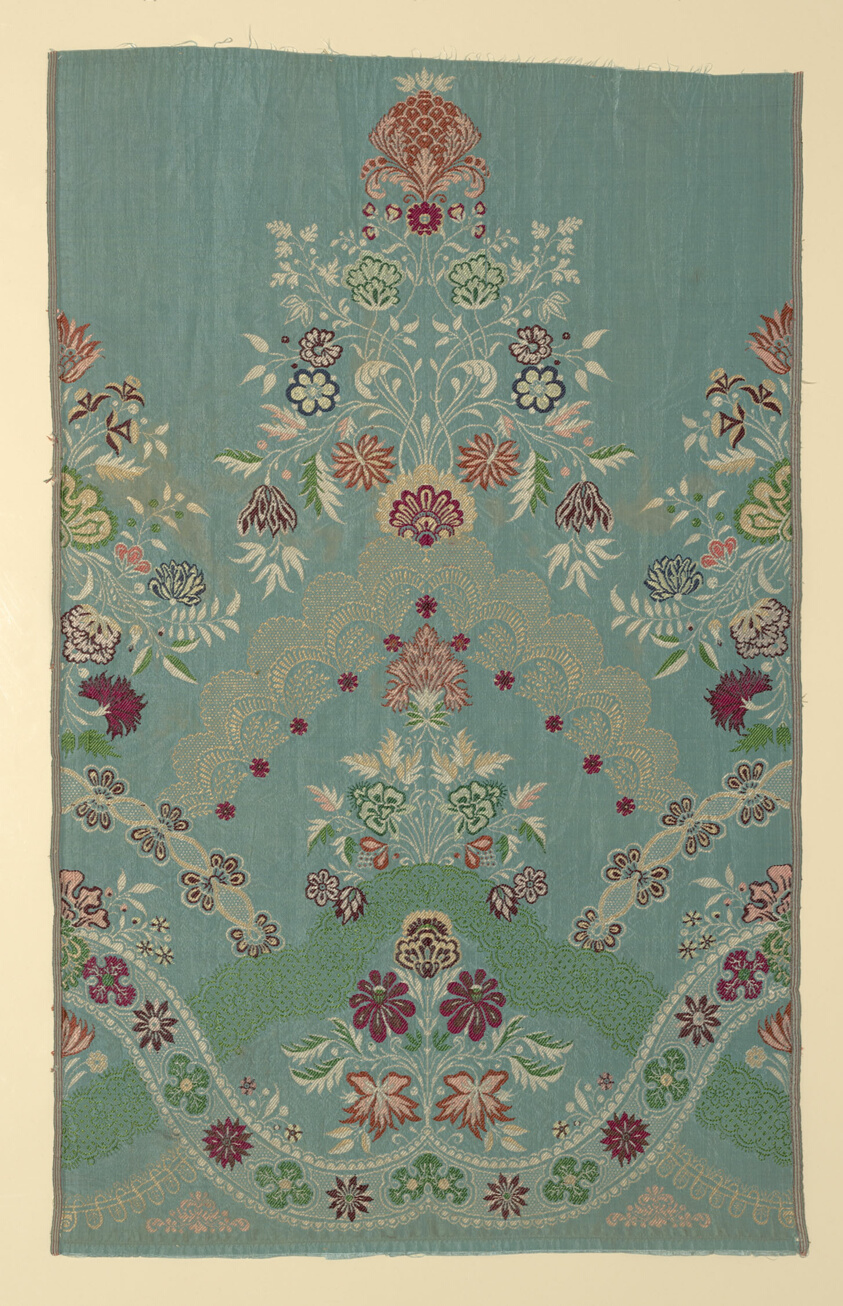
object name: Textile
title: Panel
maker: England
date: c. 1725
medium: Silk, warp-faced, weft-ribbed plain weave with weft-float faced twill interlacings of secondary binding warps and supplementary brocading wefts à la disposition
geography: England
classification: textile; weaving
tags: lace, flowers